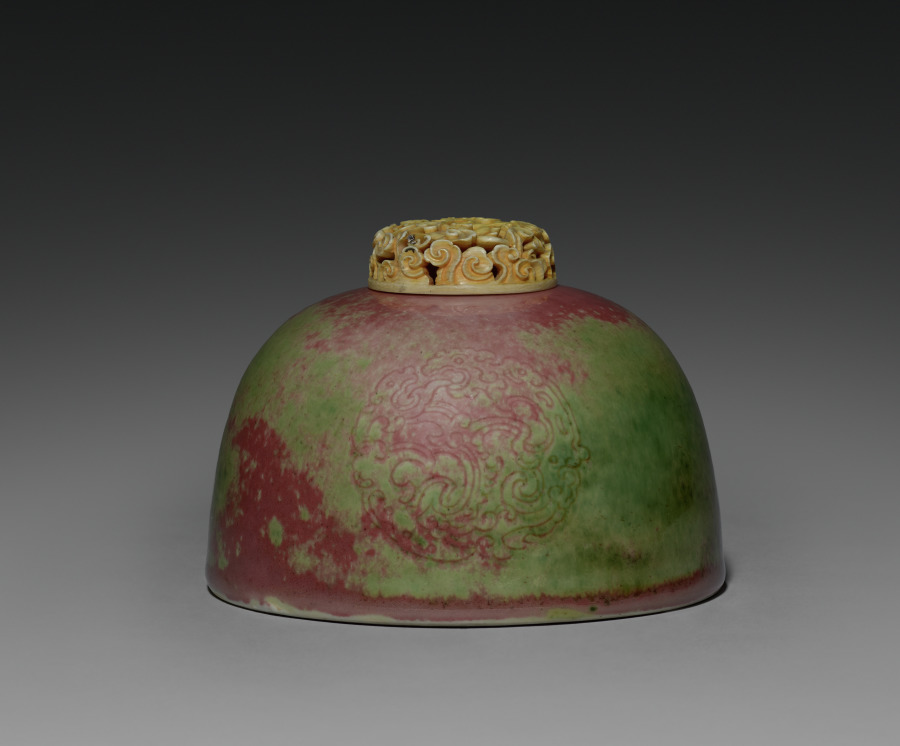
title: Water Pot with Ivory Lid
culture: China, Jiangxi province, Jingdezhen, Qing dynasty (1644-1911), Kangxi period (1662-1722)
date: 1662–1722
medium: porcelain with peach bloom glaze; ivory lid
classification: Ceramic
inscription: 大清康熙年制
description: The "peach-bloom" glaze developed during the Kangxi era has been described as "drunken with beauty." The water pot's glaze is in shades ranging from red to grayish rose. The interior and base are covered in white glaze.